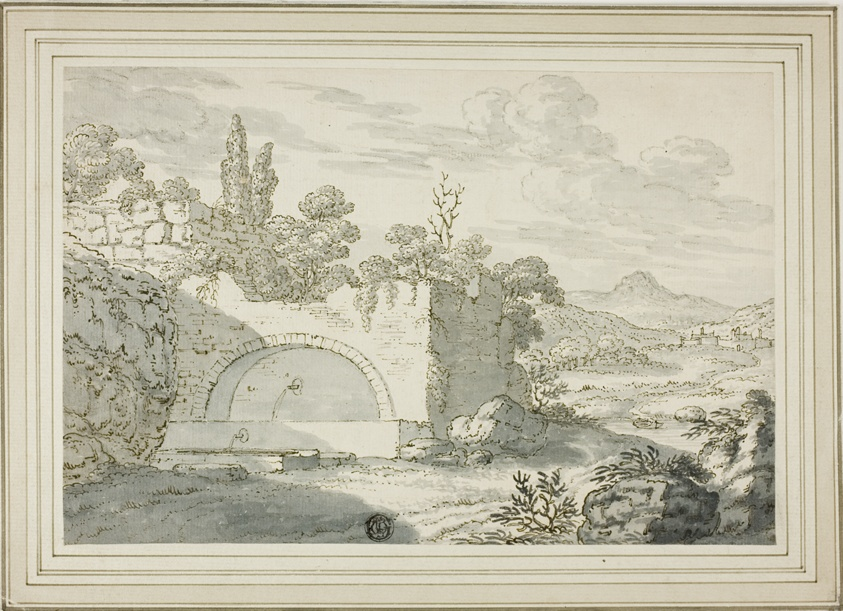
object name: Drawing and Watercolor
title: Landscape with Fountain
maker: Abraham Genoels, II (Flemish, 1640-1723); or Aarnout ter Himpel (Dutch, 1634-1686)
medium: Pen and brown ink, with brush and gray wash, and touches of black chalk, on ivory laid paper, laid down on ivory laid card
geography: Flanders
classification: pen and ink drawings; drawings (visual works); prints and drawing